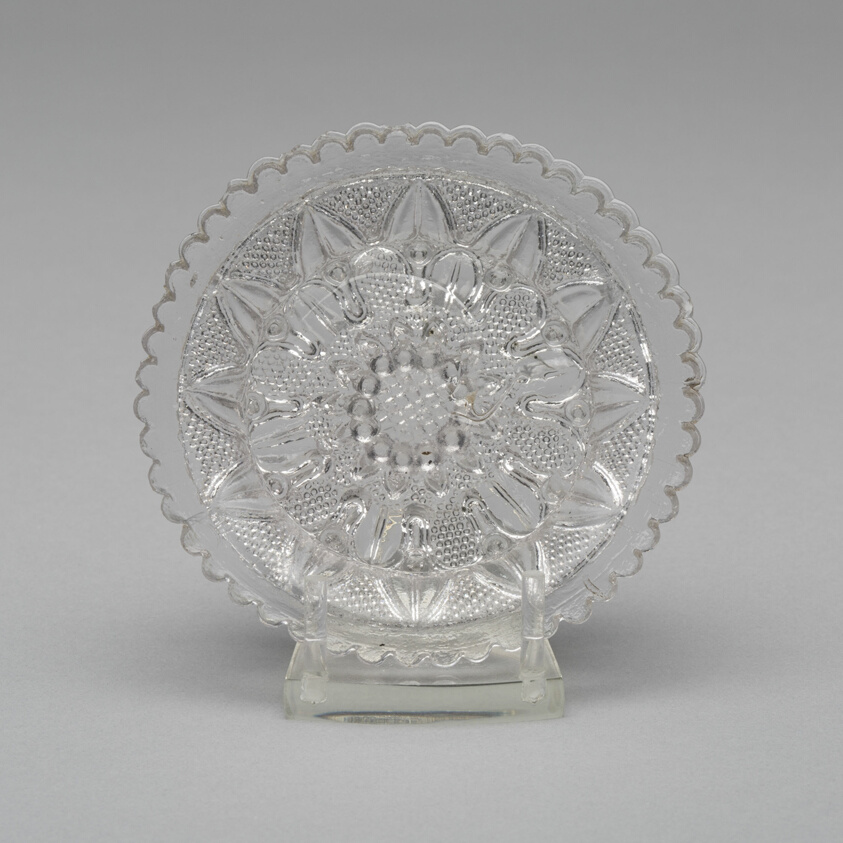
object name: Glass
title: Cup plate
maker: Artist unknown (American, 19th century); Midwest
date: 1830–35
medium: Pressed glass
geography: Midwest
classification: plate (general, dish); glass; american decorative arts; american arts; decorative arts